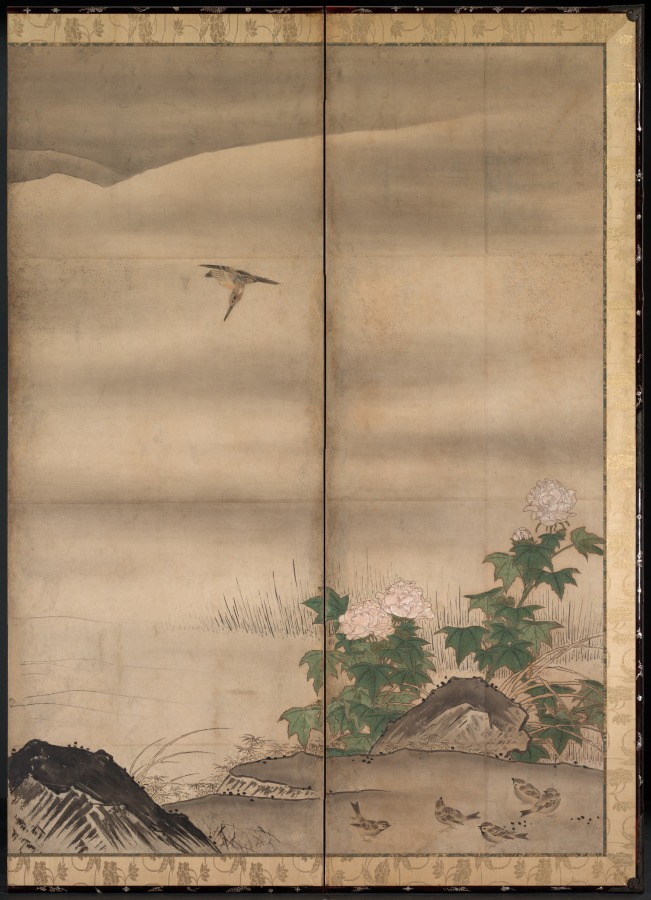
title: Birds and Flowers in a Landscape of the Four Seasons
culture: Japan, Muromachi period (1392–1573)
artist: follower of Sesshū Tōyō (Japanese, 1420–1506)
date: 1550–99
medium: Six-panel folding screen, ink and color on paper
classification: Painting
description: The monk-painter Sesshū is revered today, as he was in his own time. While he left Kyoto's sophisticated intellectual and cultural environment to live in a provincial village in a far western province, he seems never to have severed contacts with the monastic communities of his young adulthood. His residence in Yamaguchi proved fortuitous because his patron, the region's military lord, enjoyed considerable freedom in conducting trade missions overseas with Korea and China. Sesshū went to China in 1467 and traveled about the country, visiting well-known historical sites and Chan (Zen) temples before returning two years later. Thus he became familiar with contemporary painting practices, materials, formats, and subject matter. His assimilation and then transmission of these elements had a profound impact on the following generations of ink painters, patrons, and Zen communities throughout Japan. Despite the presence on these byōbu of the name "Sesshū," they are from the hand of another accomplished but as yet anonymous follower active in the middle of the sixteenth century. Sesshū's name here, as on a handful of similar bird-and-flower byōbu, attests to the master's identification at that time with the colorful mural paintings on the same theme emanating from Ming dynasty China. This genre had heretofore been relegated to hanging scroll compositions, so the intro-duction into temple and daimyo residences of such an attractive theme surely caused considerable excitement in the later fifteenth century, when in all likelihood Sesshū introduced it into the Japanese painting repertoire. Subsequently, artists of varying backgrounds and training tried their hands at these large, dramatic scenes. From right to left the composition portrays an array of flowering plants in the near distance that indicate the passage of the seasons. Birds, usually paired, occupy this setting, engaged in various activities that lend naturalism and an air of peacefulness. The world they inhabit may be characterized pictorially by expansive middle-ground waterscapes that end where the far distant mountains rise as backdrops. These features appear consistently in other bird-and-flower byōbu attributed to Sesshū. Also noteworthy is the absence of any birds of prey such as the samurai's beloved hawks, emblems of fierceness and graceful strength that appear often in the byōbu of sixteenth-century Kano and Soga school painters.